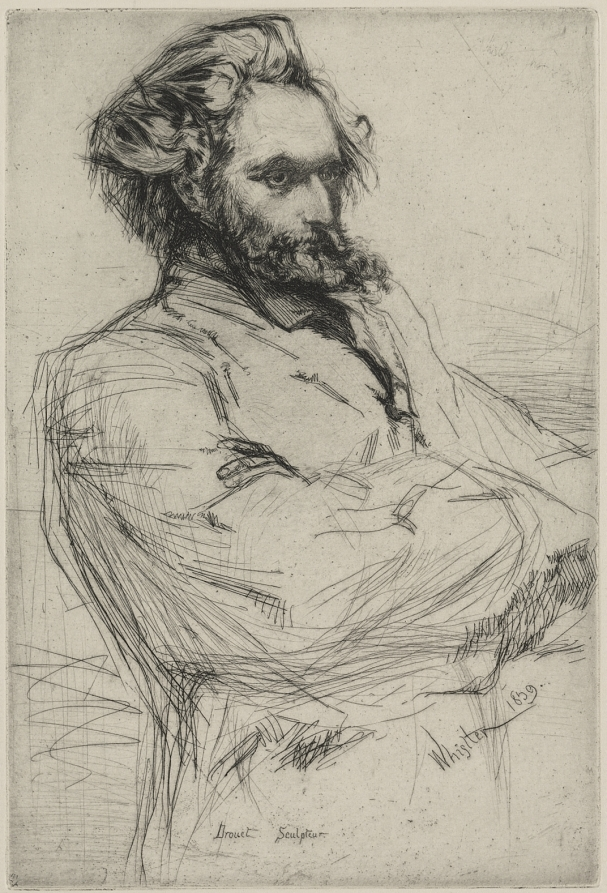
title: Drouet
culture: America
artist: James McNeill Whistler (American, 1834–1903)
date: 1859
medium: etching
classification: Print